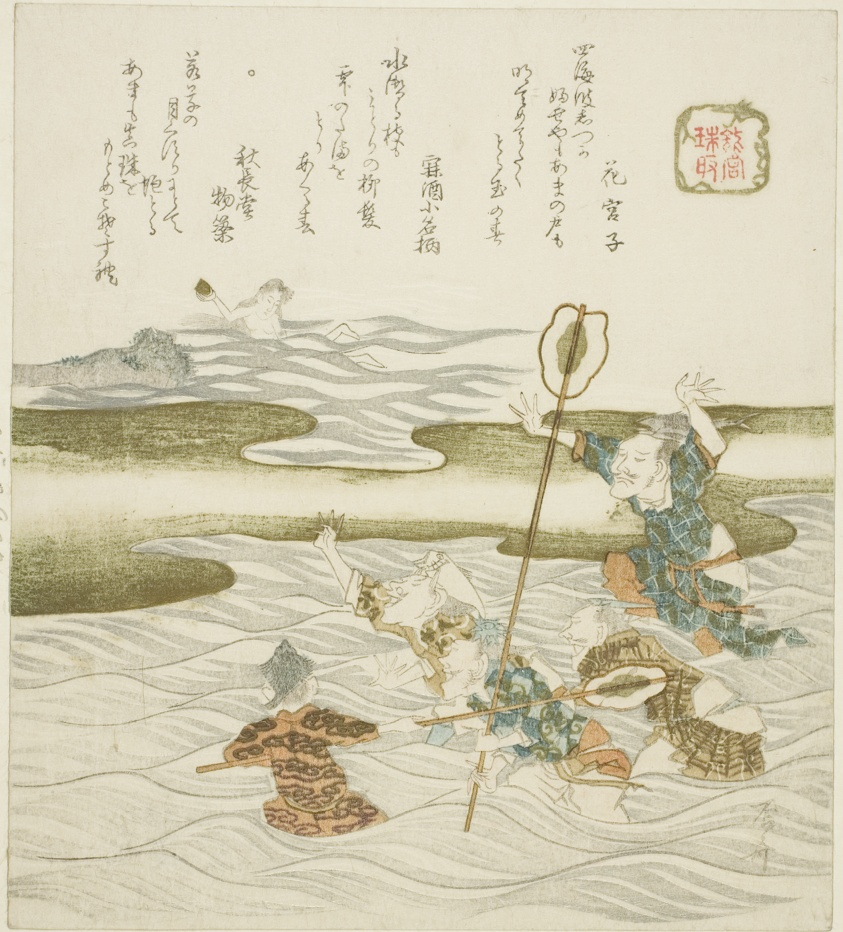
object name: Print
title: The Jewel Taker (Tamatori), from the series "The Palace of the Dragon King (Ryugu)"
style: Japanese (culture or style)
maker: Ryuryukyo Shinsai (Japanese, c. 1764-1820)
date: 1820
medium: Color woodblock print; shikishiban, surimono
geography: Japan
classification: woodblock print; print; asian art